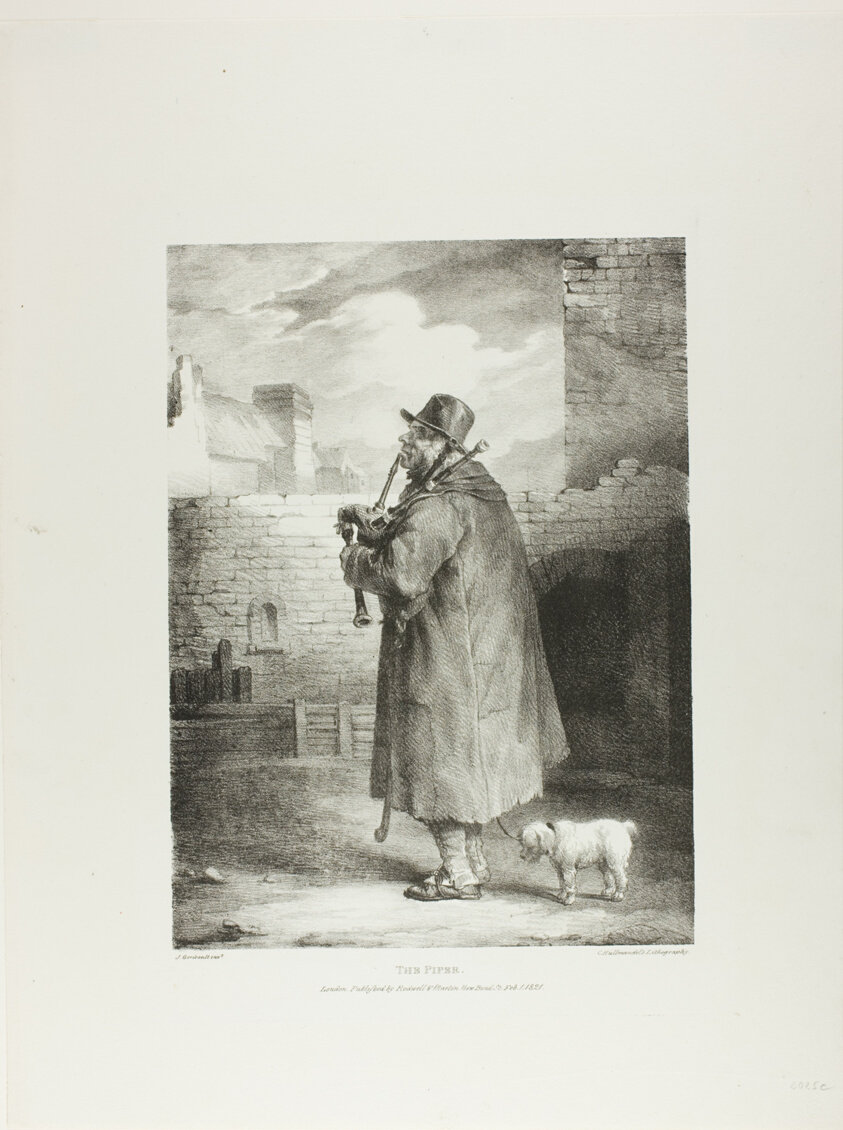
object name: Print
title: The Piper, plate 1 from Various Subjects Drawn from Life and on Stone (The English Suite)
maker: Jean Louis André Théodore Géricault (French, 1791-1824); printed by Charles Joseph Hullmandel (German and English, 1789-1850); published by Rodwell and Martin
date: February 1821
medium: Lithograph in black on ivory wove paper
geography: France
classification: lithograph; print; prints and drawing